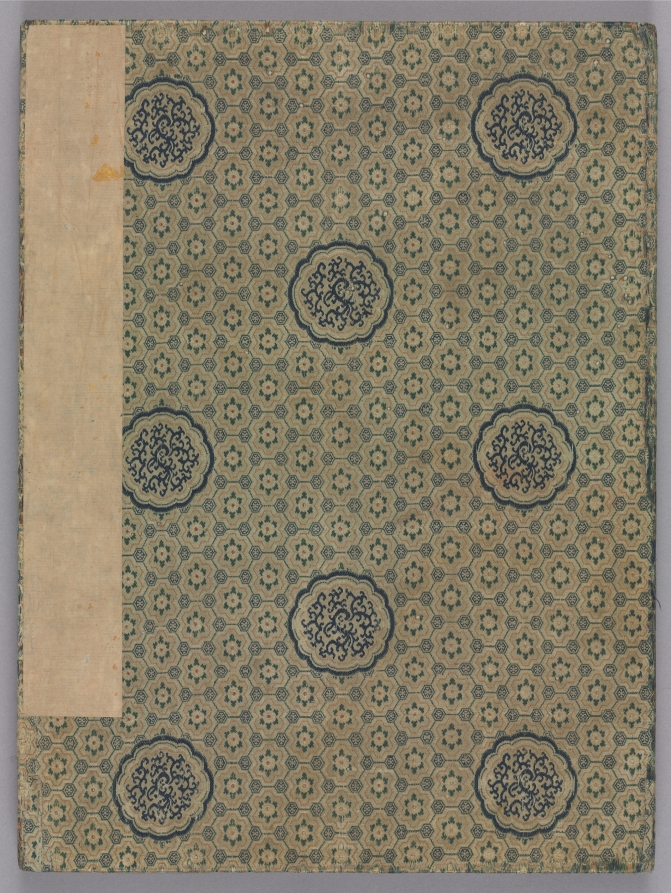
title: Landscapes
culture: China, Qing dynasty (1644–1911), Qianlong reign (1736–95)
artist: Zhai Dakun (Chinese, d. 1804)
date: 1775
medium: Album of twelve leaves; ink and color on silk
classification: Painting